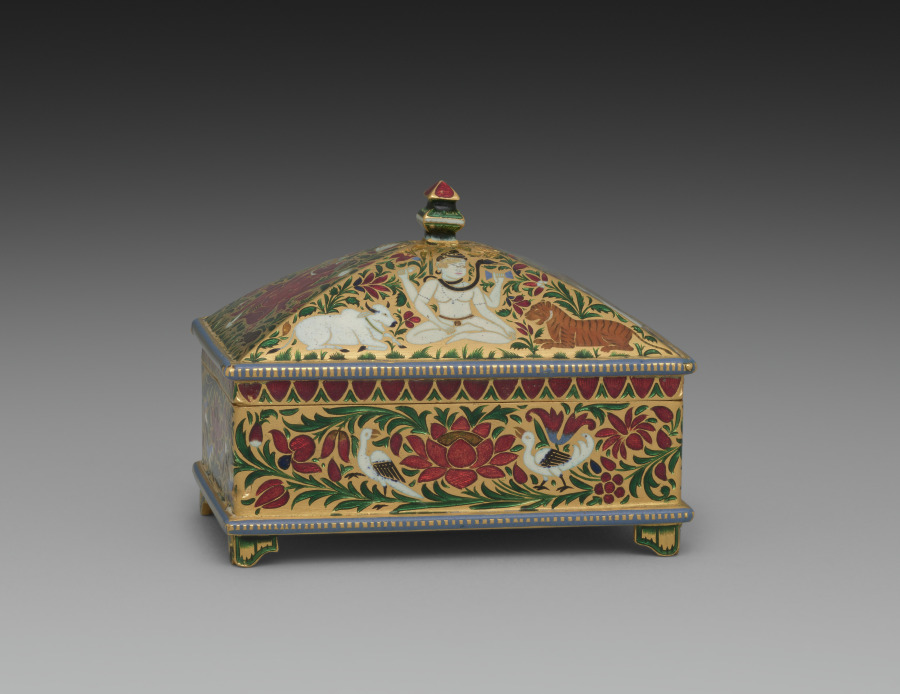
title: Box decorated with Shiva, Vishnu, Krishna, and Ganesha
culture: Northwestern India, Rajasthan, Rajput Kingdom of Jaipur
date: c. 1800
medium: gold with enamel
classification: Metalwork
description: This box is covered in a variety of birds, animals, and plants. The central motifs on the lids include images of four Hindu gods: Shiva, Krishna, Vishnu, and Ganesha. The blue figures are Vishnu and Krishna, the latter of which is an incarnation of the former who is shown playing a flute. The elephant-headed Ganesha is red and accompanied by his mount, the bandicoot rat Dinka. The four-armed Shiva is paired with two animals, including a tiger and his sacred bull mount Nandi. Small enamel boxes could be used to house many different substances, from cosmetics to spices to stimulants, including opium and paan, a digestive typically given at formal gatherings as a sign of the host’s hospitality.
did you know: Shiva’s mount is the bull; the tiger is the mount of his wife.